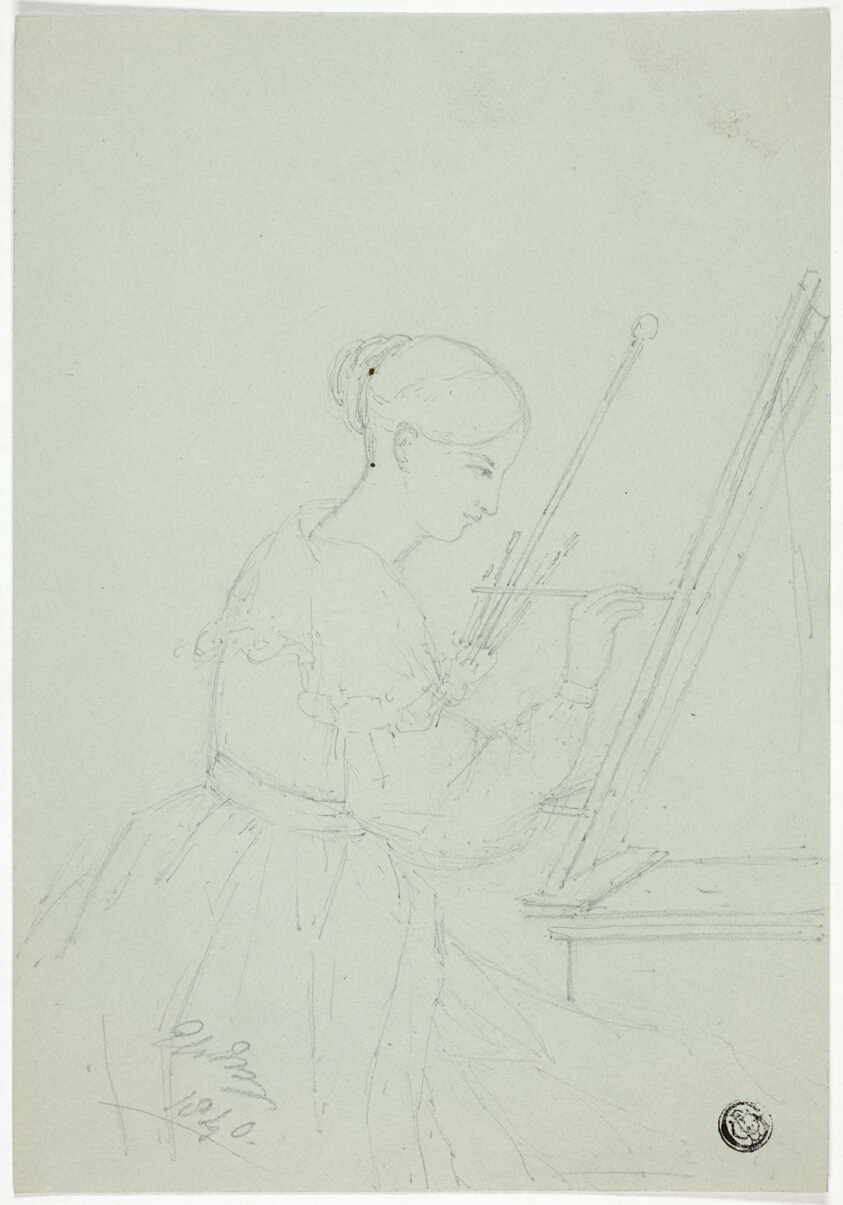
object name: Drawing and Watercolor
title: Young Woman Painting (possibly a Self Portrait)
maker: Elizabeth Murray (English, c. 1815-1882)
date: 1840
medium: Graphite on blue wove paper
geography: England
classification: graphite; drawings (visual works); prints and drawing